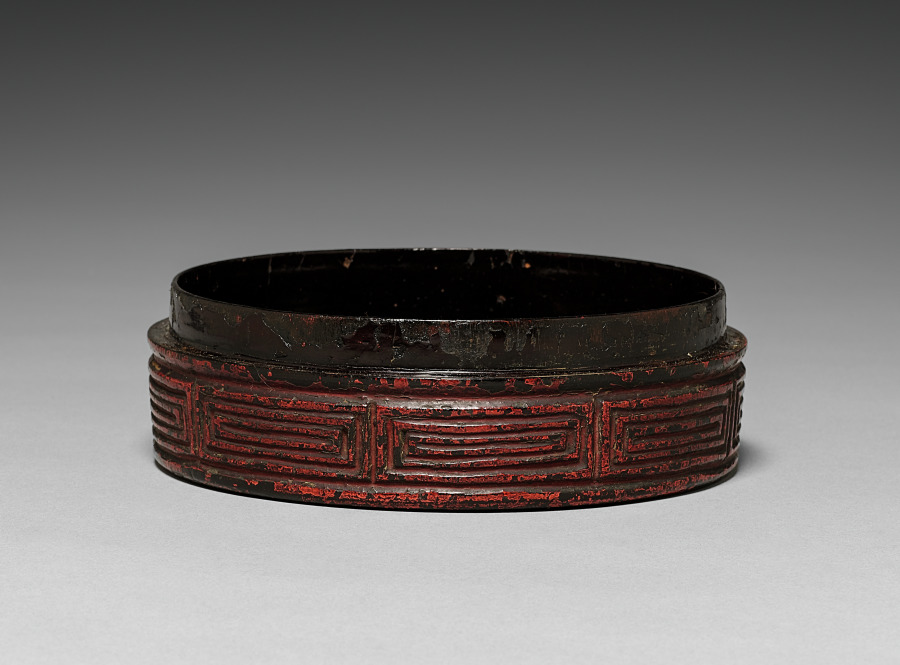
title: Incense Box (Kogo) with Camellia Design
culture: Japan, Muromachi period (1392–1573)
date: 1500s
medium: carved wood with black and red lacquer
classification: Lacquer